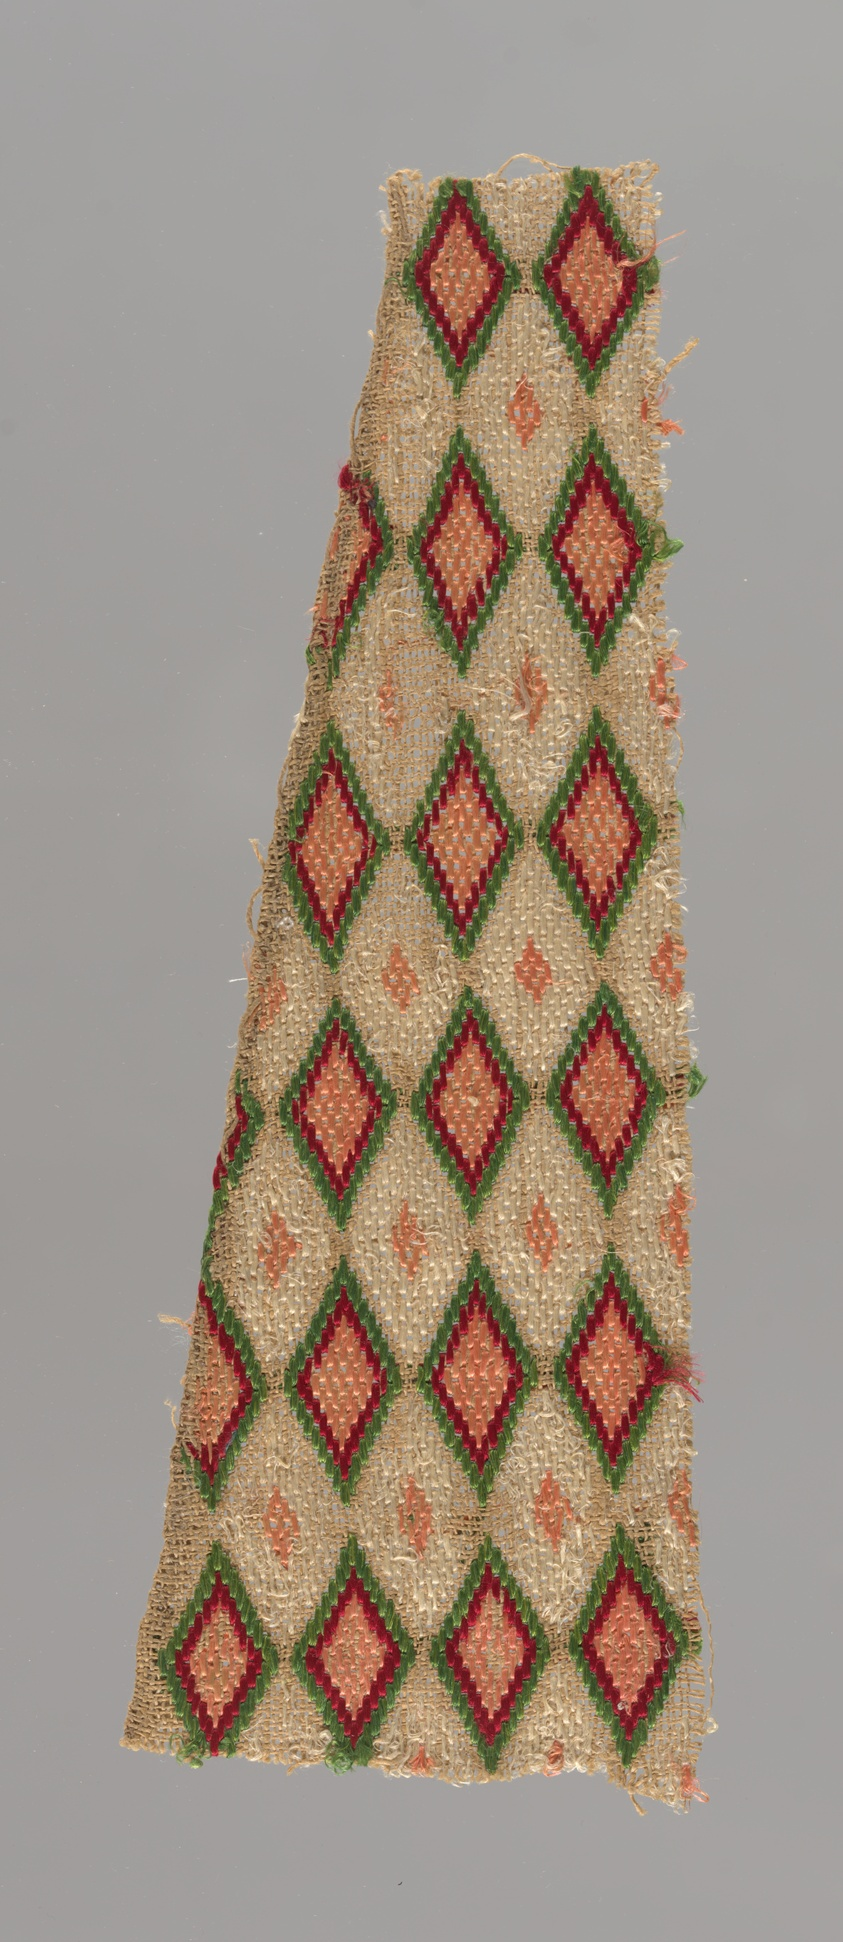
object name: Textile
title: Fragment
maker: Italy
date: 18th century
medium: Linen; embroidered with silk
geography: Italy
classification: textile; needlework (visual works)